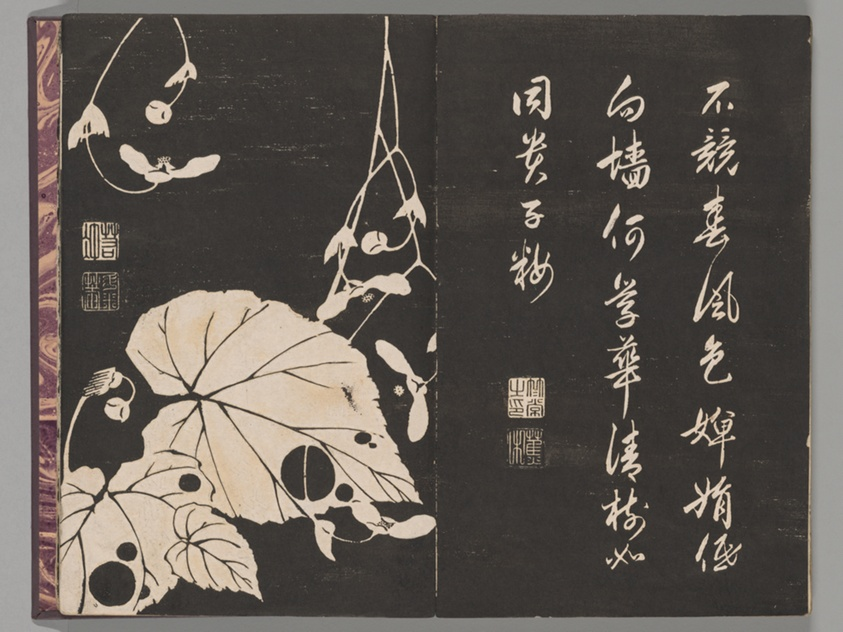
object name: Book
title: Soken sekisatsu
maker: Ito Jakuchu (Japanese, 1716-1800)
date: 1767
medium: Woodblock printed book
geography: Japan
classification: book